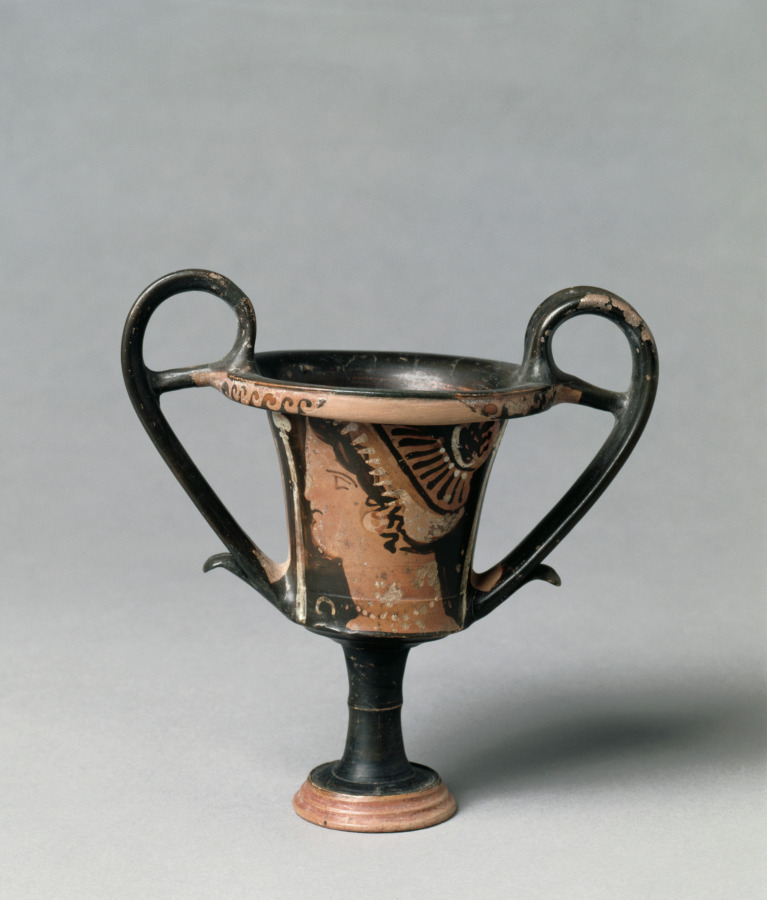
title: Red-Figure Kantharos (Drinking Cup): Female Heads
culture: South Italian, Apulian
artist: attributed to Prague Group (South Italian, Apulian)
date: 330–320 BCE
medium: ceramic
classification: Ceramic